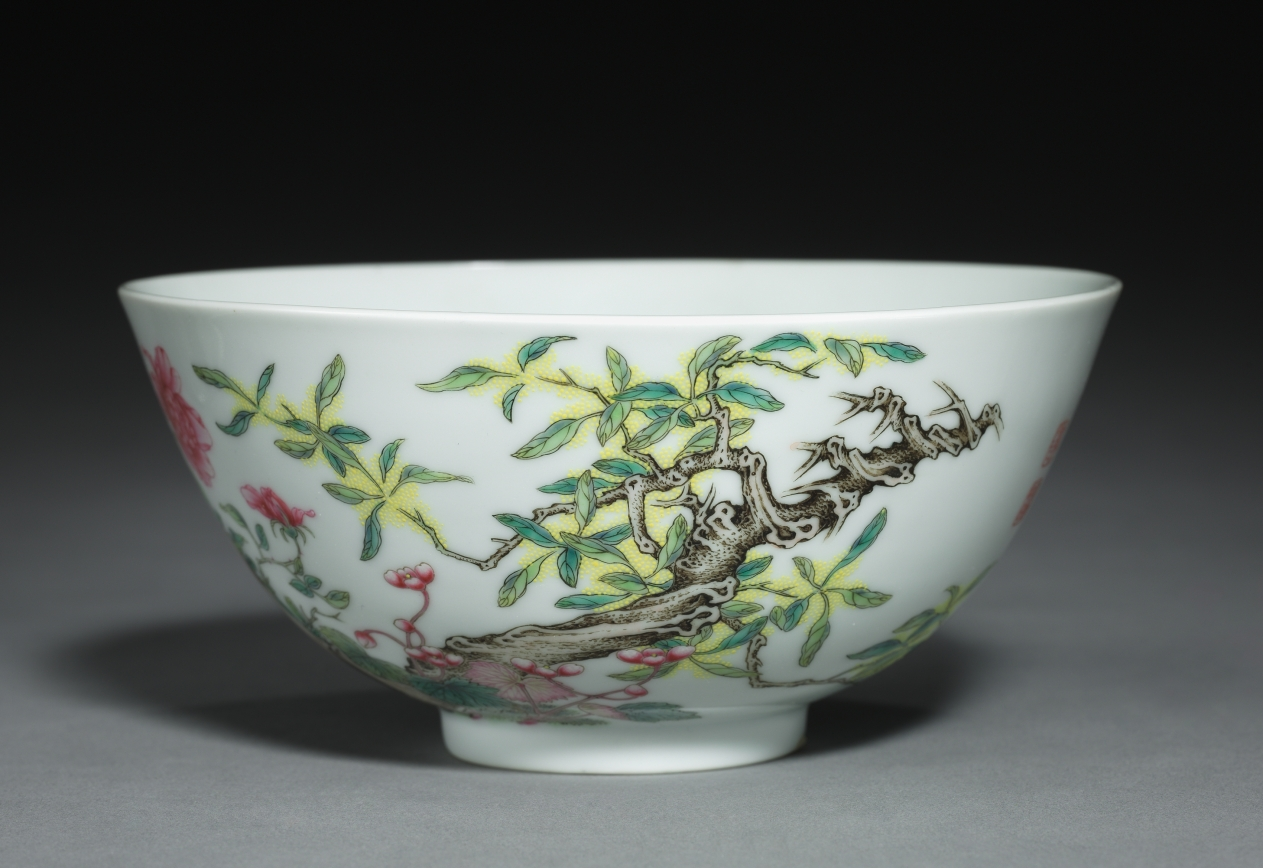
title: Bowl with Poppies, Tree Peony, and Flowering Mimosa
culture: China, Jiangxi province, Jingdezhen, Qing dynasty (1644-1911), Yongzheng mark and reign (1723-1735)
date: 1723–35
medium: porcelain with overglaze enamel decoration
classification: Ceramic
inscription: 大清雍正年制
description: Developments in enamel technology led to new possibilities in polychrome decoration. Pinks appeared, lending their name to the new palette of overglaze colors (famille rose), and the addition of opaque white allowed painters to vary the value of pigments, enhancing the painterly quality of porcelain decoration. As on painted scrolls and album leaves, the image is accompanied with a poem, in this case: "Branches come alive in the moonlight; Blossoms fill the autumn realms."